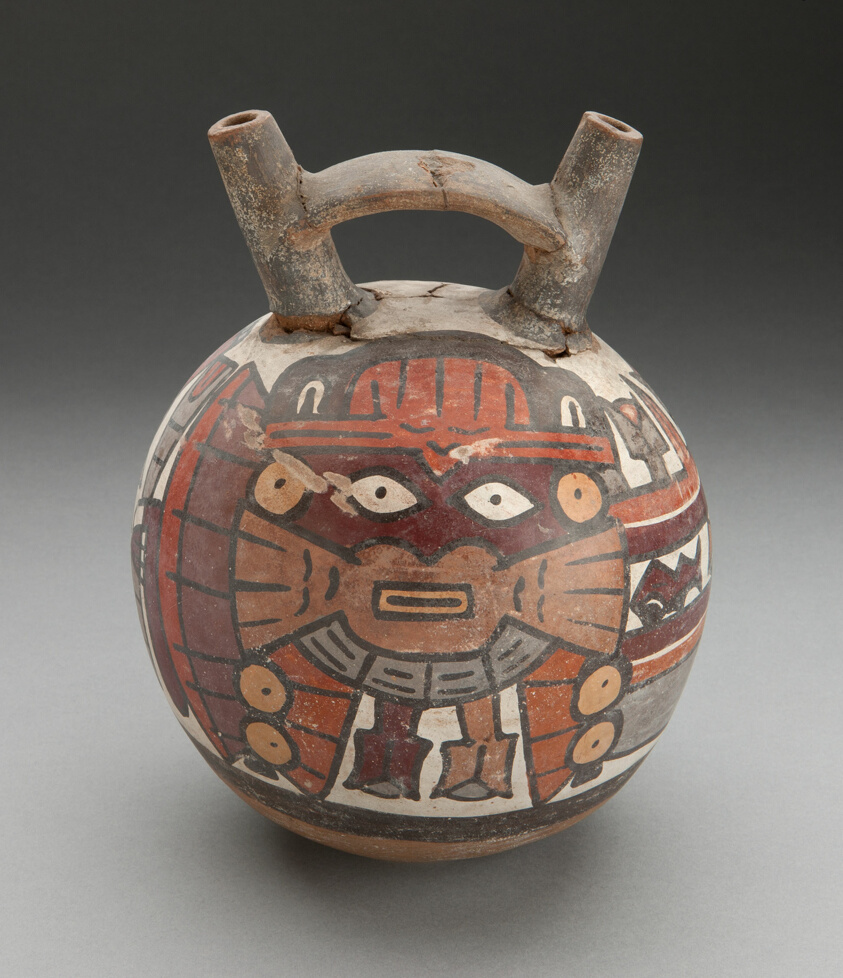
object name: Vessel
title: Double Spout Vessel Depicting Masked Performer with Fertility Motifs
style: nazca, early intermediate period, Pre-Columbian, americas, Arts of the Americas, andean, andes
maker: Nazca; South coast, Peru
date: 180 BCE–500 CE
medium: Ceramic and pigment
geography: Nazca Valley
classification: earthenware; art of the americas; ceramics; vessel